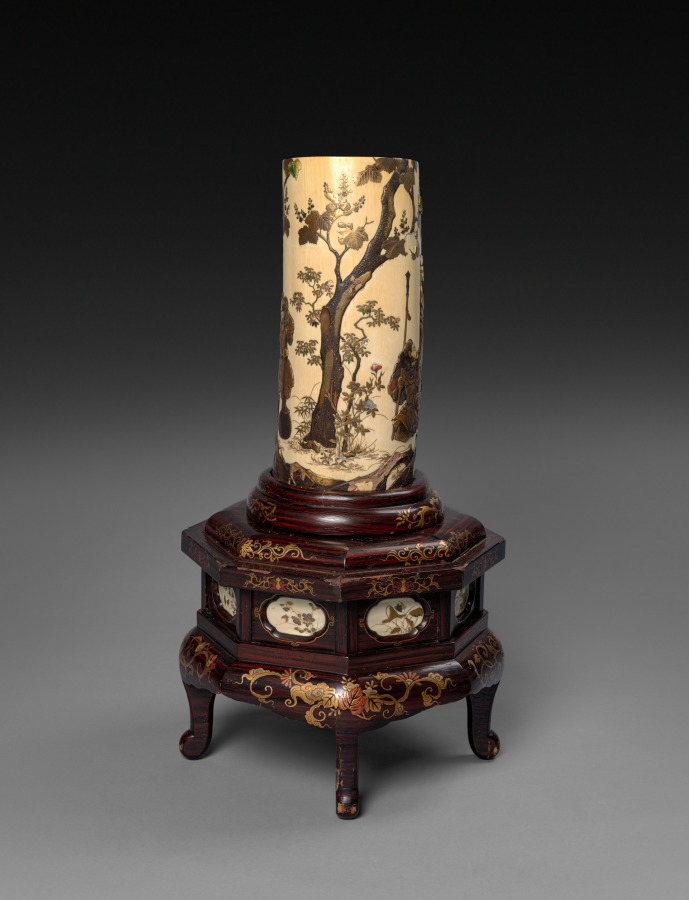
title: Ivory Tusk Vase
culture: Japan, Meiji period (1868–1912)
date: late 1800s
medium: carved ivory, pigment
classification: Ivory